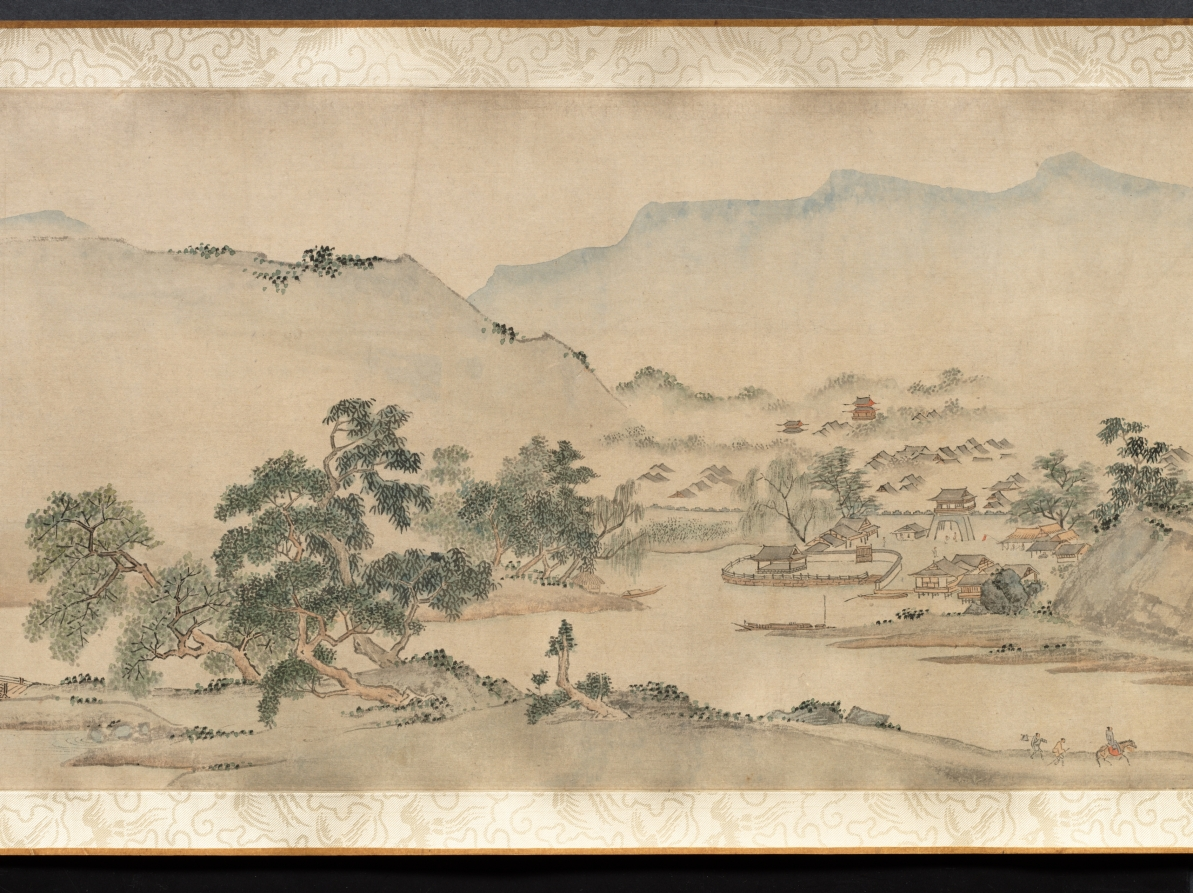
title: Ten Thousand Li of the Yangzi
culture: China, Ming dynasty (1368–1644)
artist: Dai Jin (Chinese, 1388–1462)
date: c. 1400s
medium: Handscroll; ink and color on paper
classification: Painting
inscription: Two colophons at end. Artist's seals: Dai Jin 戴進 and Wenjin 文進.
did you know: Dai Jin is traditionally considered the founder of the Zhe School, a style of landscape painting.